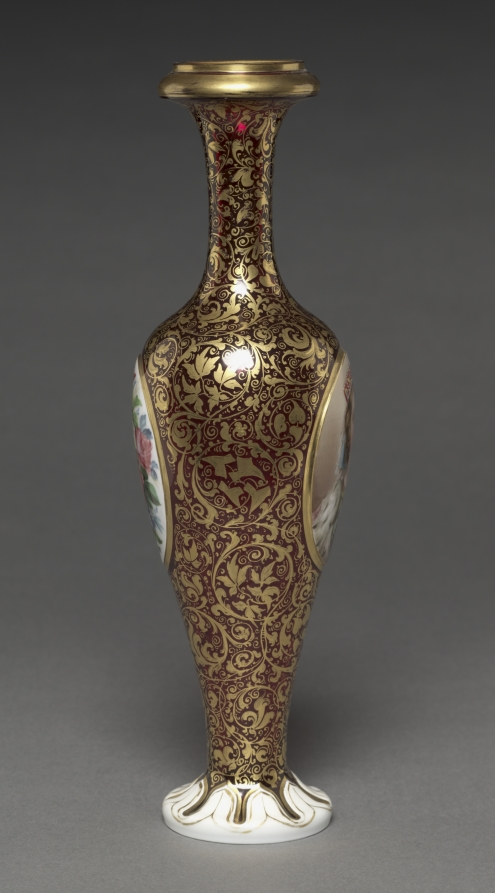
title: Vase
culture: Bohemia (?), 19th century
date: 1840–1860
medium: glass with enamel and gilt decoration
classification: Glass